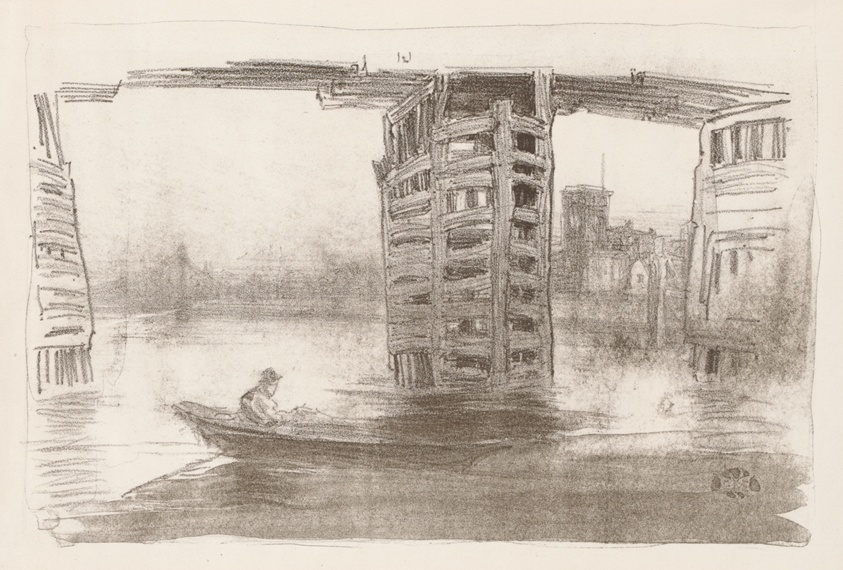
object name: Print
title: The Broad Bridge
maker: James McNeill Whistler (American, 1834-1903)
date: 1878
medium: Lithotint in brown ink, with scraping, on ivory plate paper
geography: United States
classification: lithotint; lithograph; print; prints and drawing; paper